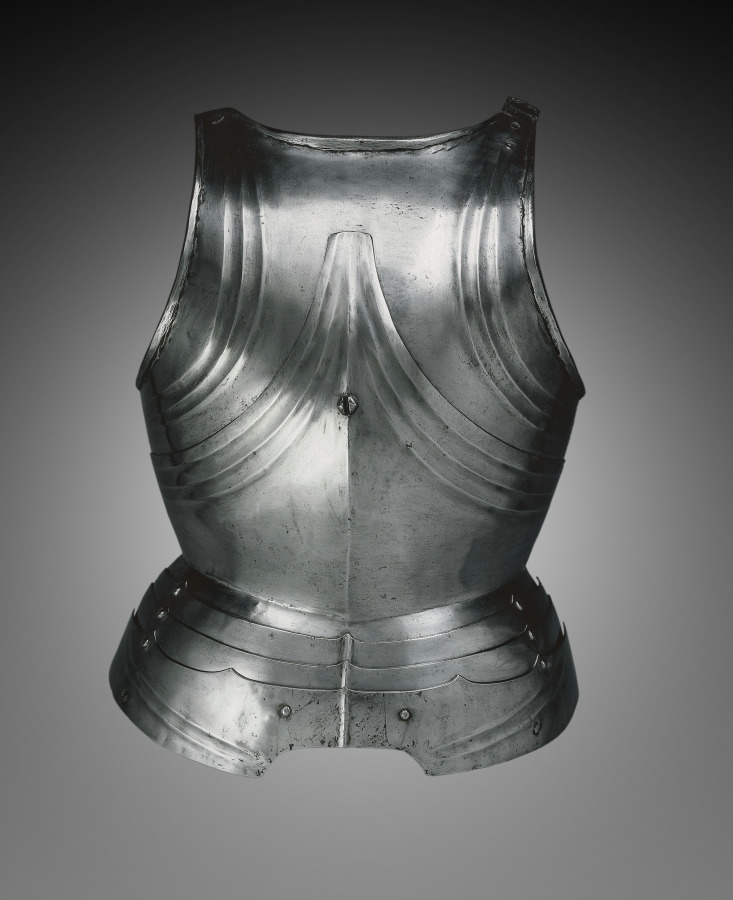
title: Gothic Breastplate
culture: South Germany or Austria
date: c. 1485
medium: steel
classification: Arms and Armor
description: Individual armor elements, like this breastplate, were shaped in ways that would make their surfaces as deflecting as possible. The contours of this breastplate, along with the pronounced vertical ridge down its center, were for precisely this purpose.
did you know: This breastplate consists of two primary plates of steel fastened at the center by a rivet.